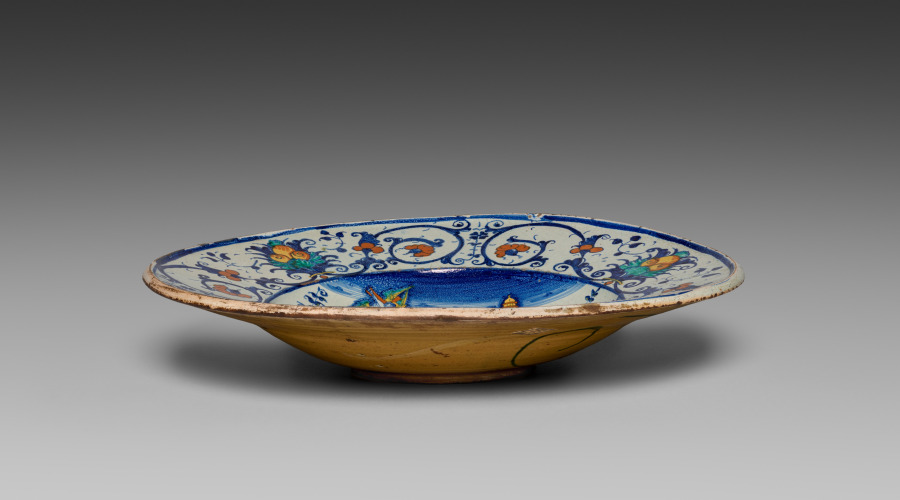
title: Bowl Depicting Saint Francis Receiving Stigmata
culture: Italy, Deruta, 16th century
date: 1531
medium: tin-glazed earthenware (maiolica)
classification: Ceramic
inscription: dated on reverse: "1531"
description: In this depiction representing his closeness to Christ, Saint Francis receives the stigmata through strikes of light from a vision of the risen Lord hovering as an angel in front of the basilica at Assisi. This bowl likely recalls a panel painting produced by the Italian master painter Giotto around 1300.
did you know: According to Christian tradition, the stigmata correspond to the appearance of Christ’s wounds at similar places on the faithful following his crucifixion.